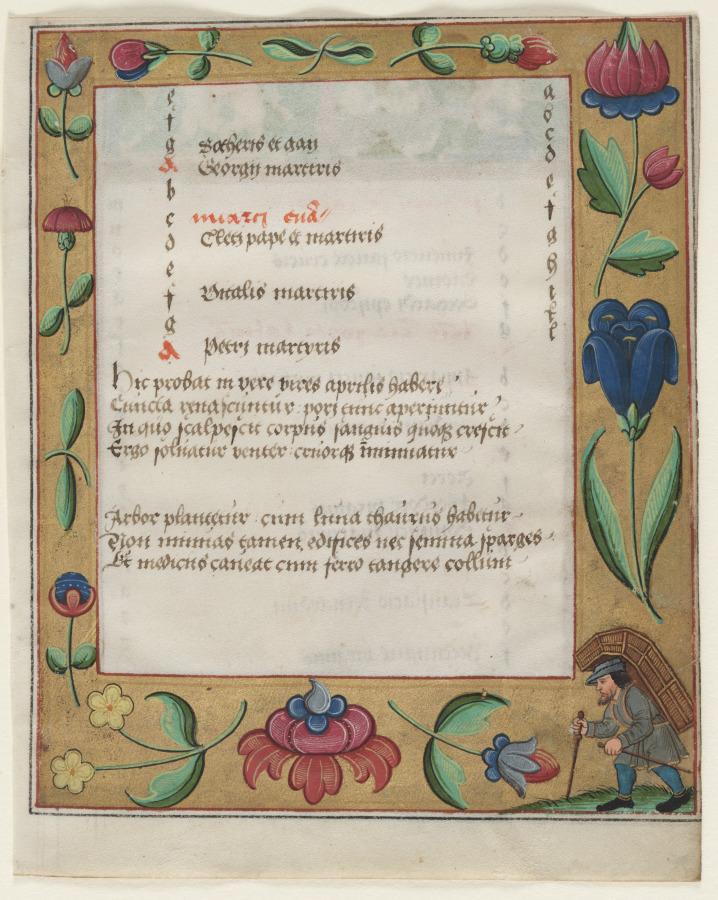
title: Leaf from a Psalter and Prayerbook: Calendar Page with Peasant (verso)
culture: Germany, Hildesheim (?), 16th century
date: c. 1524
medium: ink, tempera and liquid gold on vellum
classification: Manuscript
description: This leaf and three others in the collection represent the charming, intricate decoration found throughout the parent volume, its leaves now dispersed. Virtually every border, recto and verso, was decorated with liquid gold and highlighted with a variety of flowers, fruits, and vegetables—carnations, thistles, roses, violets, peas, melons—as well as cornucopias, satyrs, masks, insects, birds, etc. The decoration is particularly charming because of the little vignettes within the borders. These motifs depict a girl kneading bread, a cook ladling soup, a goose nibbling grapes off a vine, and a satyr with a horn. Such details would have been a sumptuous delight to the original owner. This was a highly personalized volume, apparently written and illuminated in North Germany. The prominent mention of Saint Godehard (died 1038), Bishop of Hildesheim, in the original manuscript suggests that it was produced in that city.